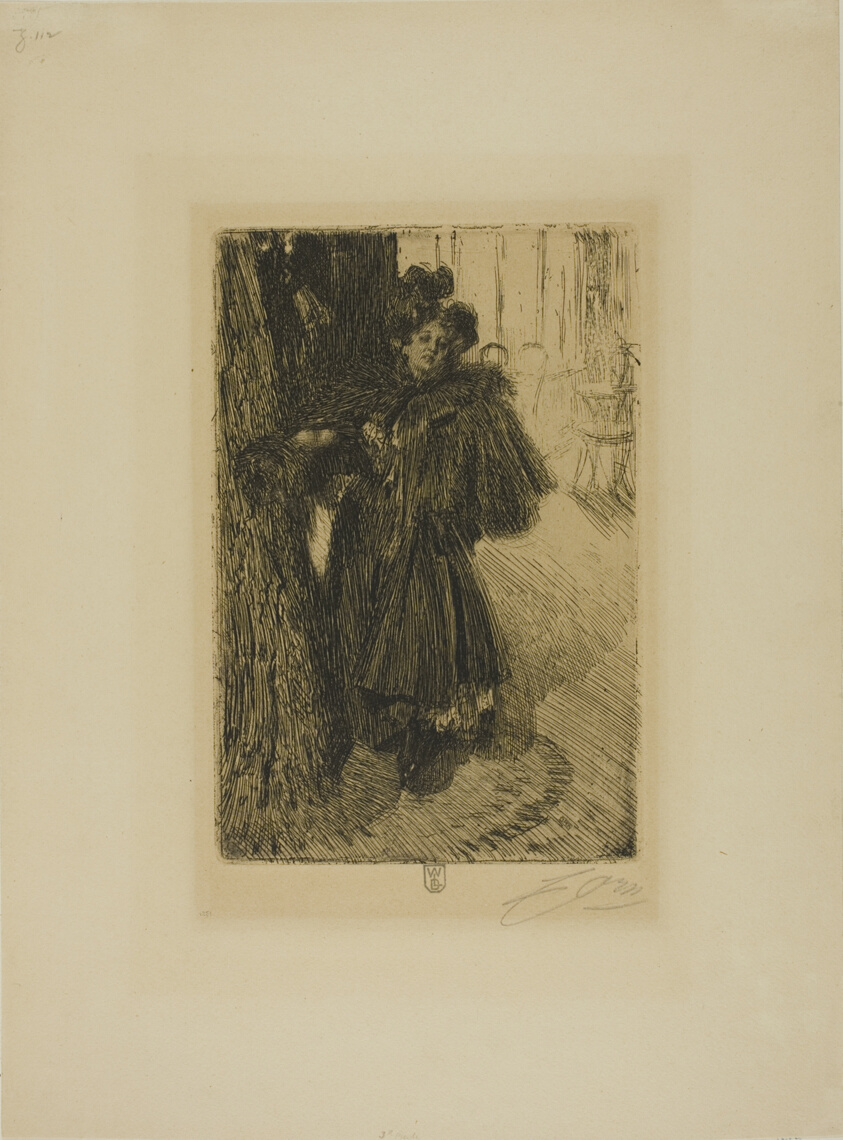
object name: Print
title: Effet de Nuit II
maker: Anders Zorn (Swedish, 1860-1920)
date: 1895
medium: Etching on tan wove paper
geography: Sweden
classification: etching; print; prints and drawing